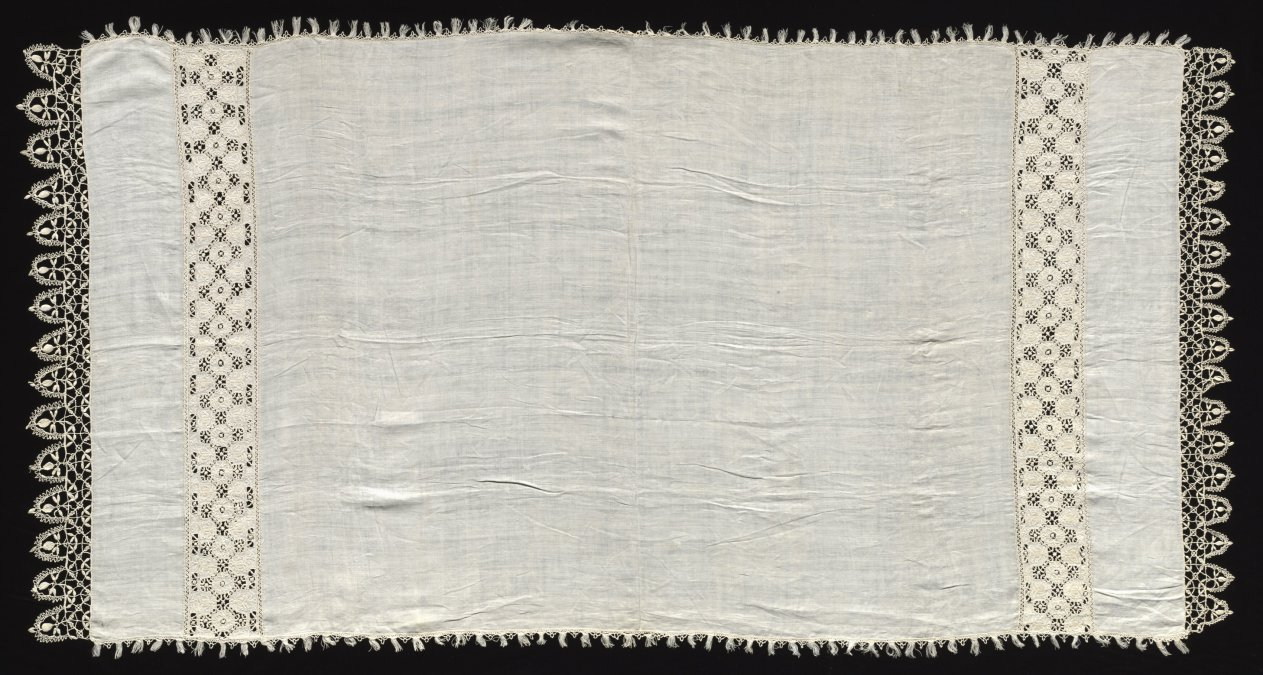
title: Lace Cloth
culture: Italy, Genoa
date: 1500s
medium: Linen: needle lace (cutwork) and bobbin lace edging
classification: Lace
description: The lace design on this cloth is based on reticella motifs.